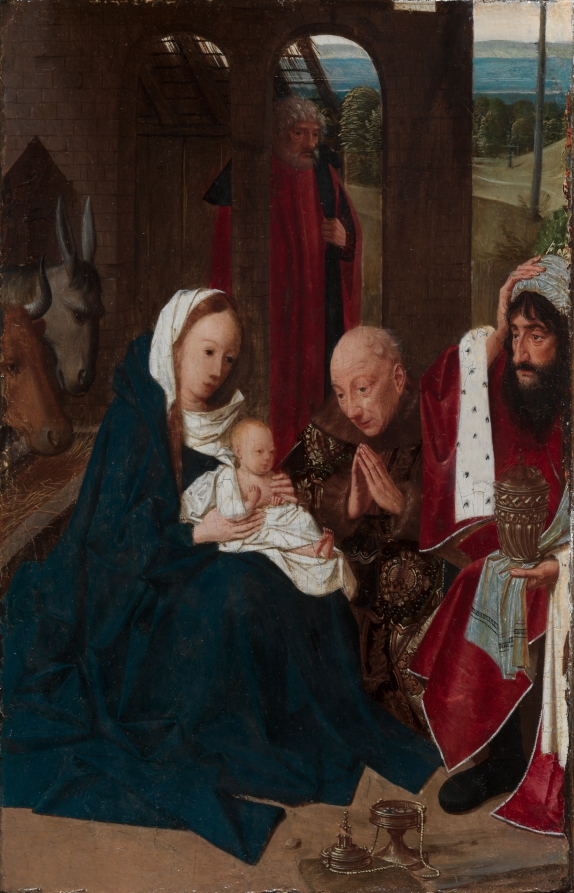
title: The Adoration of the Magi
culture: Netherlands, Haarlem, 15th century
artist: Geertgen tot Sint Jans (Netherlandish, c. 1460-c. 1490)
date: 1480s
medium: oil on wood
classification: Painting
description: Little is known about the life and career of Sint Jans. He seems to have been born in Haarlem in Holland in the northern Low Countries where he may have been attached to the Knights of Saint John as a lay brother, and likely produced an altarpiece for that order. (His name seems to derive from his affiliation with the Knights of Saint John.) He died young in his late 20s. Between 12 and 16 paintings are attributed to him. The subjects tend to derive from the New Testament. The original context of this painting is not known.